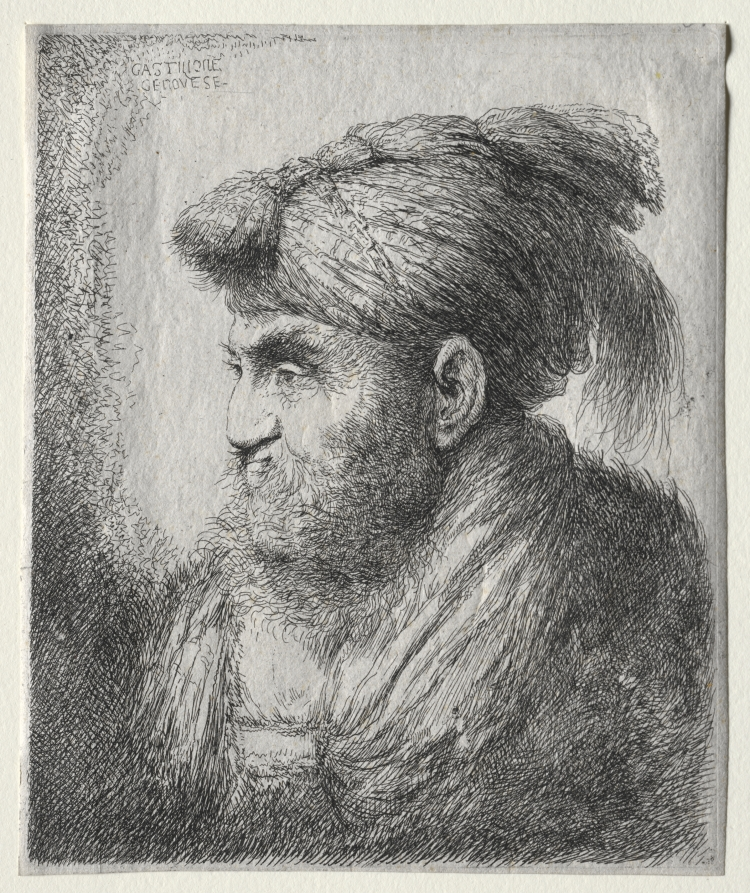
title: Head of a Man in Oriental Turban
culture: Italy, 17th century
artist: Giovanni Benedetto Castiglione (Italian, 1609–1664)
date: c. 1650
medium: etching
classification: Print